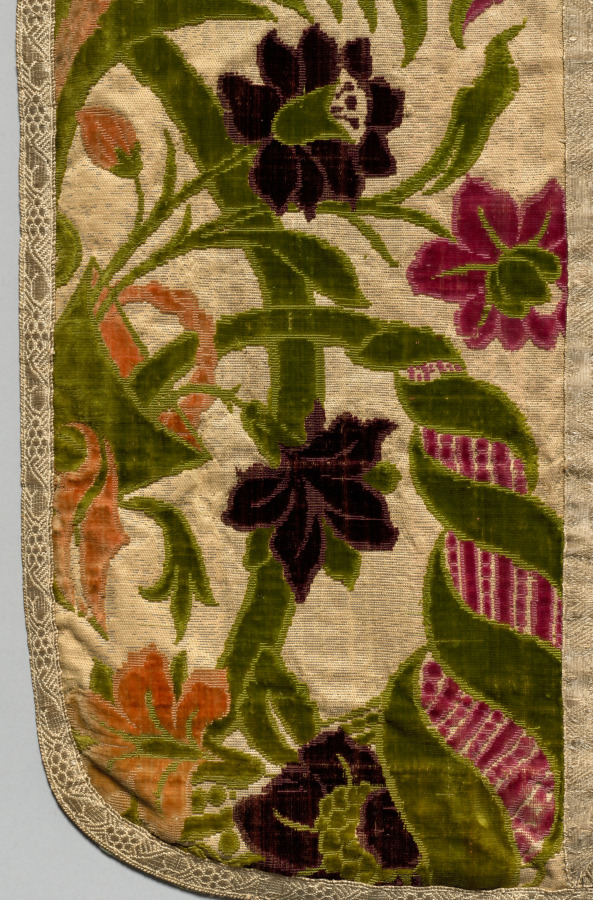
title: Chasuble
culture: Italy, Genoa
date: c 1600–1700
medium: Silk and gilt metal threads, woven; cut and uncut velvet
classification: Velvet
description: This sumptuous polychrome velvet displays a central vase with abundant flora and exotic leaves flanking curving blossoming fronds on a gilt-metal thread ground. The pattern was created with five colors of cut and uncut (loops) velvet pile. Only the pile warps for the lush green velvet occur across the entire cloth, while each additional color appears in vertical stripes—crimson, peach, rose, and purple. These widely acclaimed velvets from Genoa were the most colorful woven in Europe. Both the long stole and the shorter maniple are insignia of the office of deacons, priests, and the higher clergy. The stole was worn under a chasuble according to the office and the maniple was hung on the left forearm. The burse is a stiff receptacle in which the folded corporal, a white linen cloth on which the sacred bread and chalice are placed during the Mass, is carried to and from the altar. The upper fabric matches the chasuble, the bottom is a plain silk, and the interior has an obligatory linen lining.